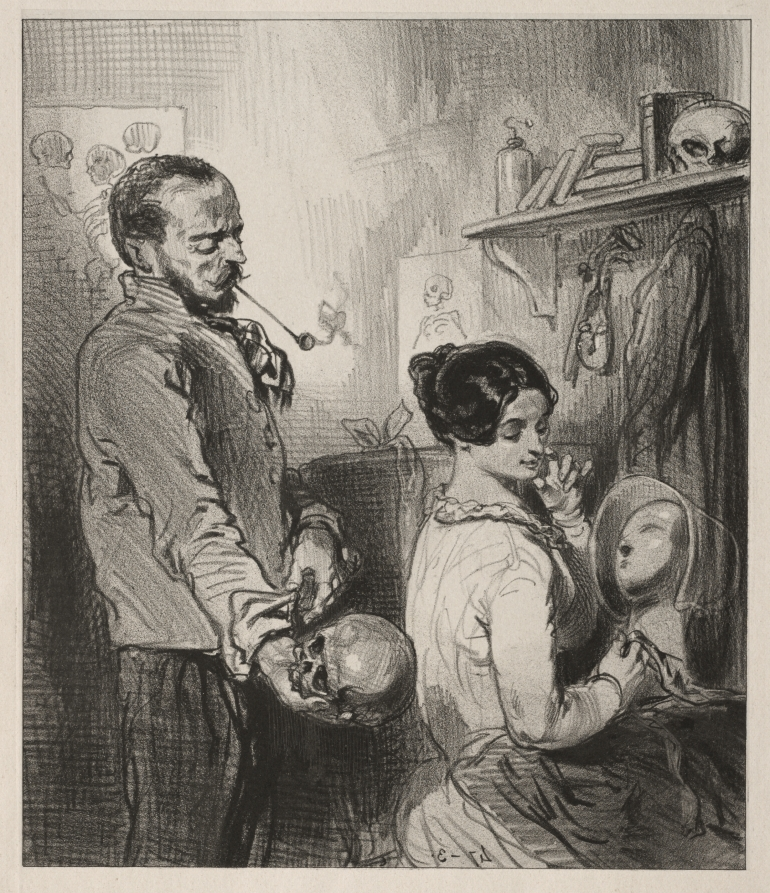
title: Baliverneries Parisiennes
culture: France, 19th century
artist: Paul Gavarni (French, 1804–1866)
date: c. 1846–47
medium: lithograph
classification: Print